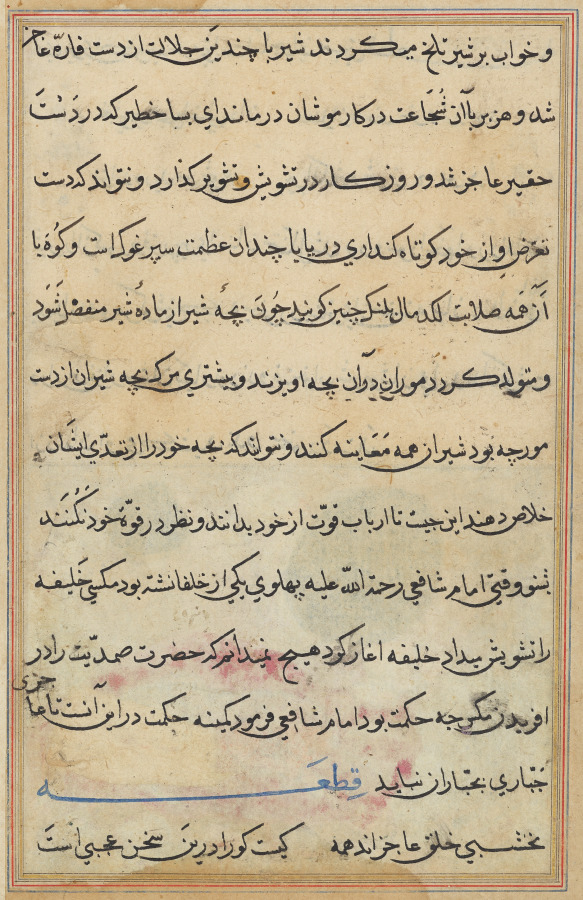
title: Page from Tales of a Parrot (Tuti-nama): text page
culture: Mughal India, court of Akbar (reigned 1556–1605)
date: c. 1560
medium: gum tempera, ink, and gold on paper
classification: Painting